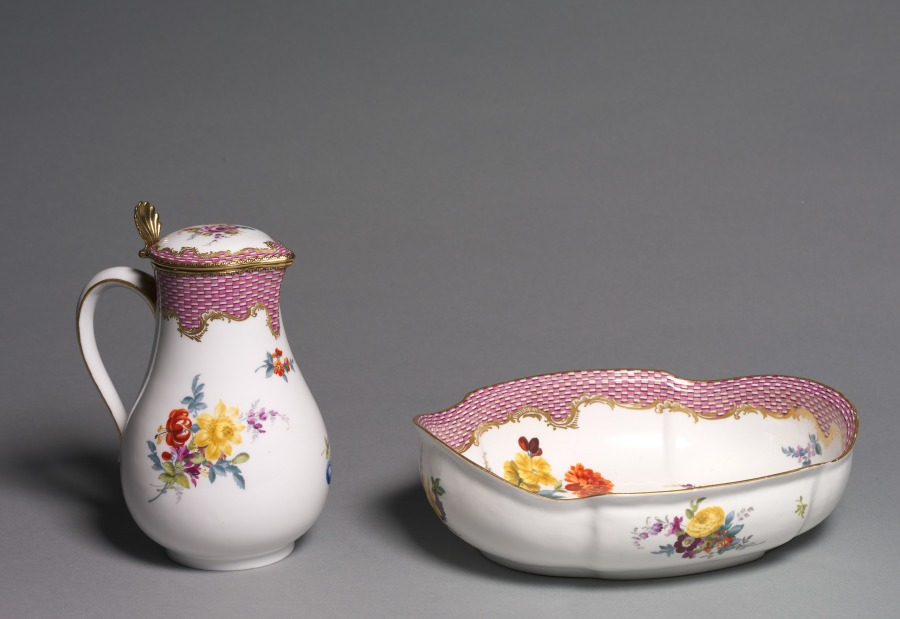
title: Covered Jug and Basin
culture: Germany, Meissen, 18th century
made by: Meissen Porcelain Factory (German, est. c. 1710)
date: c. 1765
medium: porcelain with gilt metal mounts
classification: Ceramic